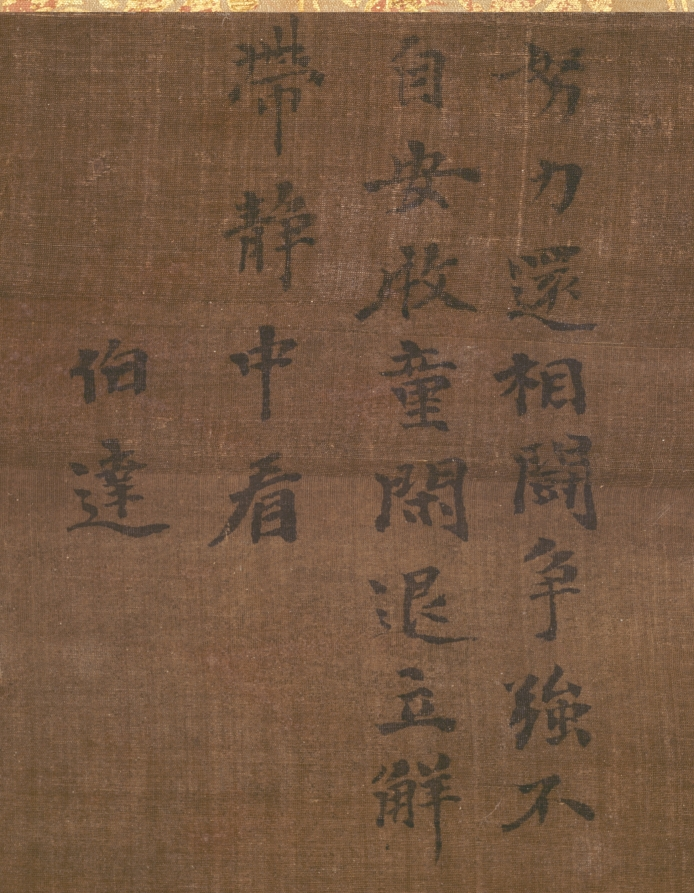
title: Herdboys and Buffalo in Landscape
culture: China, Qixian, Yuan dynasty (1271-1368)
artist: Guo Min (Chinese, mid-late 1200s)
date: 1200s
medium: Hanging scroll; ink on silk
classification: Painting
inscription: 努力還相鬪，爭強不自安。/ 牧童閑退立，解帶靜中看。/ 伯達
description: Herdboys tend their buffalo in a bucolic landscape by a winding stream. Guo Min emphasizes the massive forms and mighty power of the animals, transforming them into forces of nature. The poem on this scroll reads: "The bulls are engaging in fighting, Cautiously, each seeks to overcome the other. The herdboy calmly stands by. Untying his belt, he silently watches."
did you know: Tending water buffalos has traditionally been the task of young boys and can still be seen in rural areas of Southern China today.